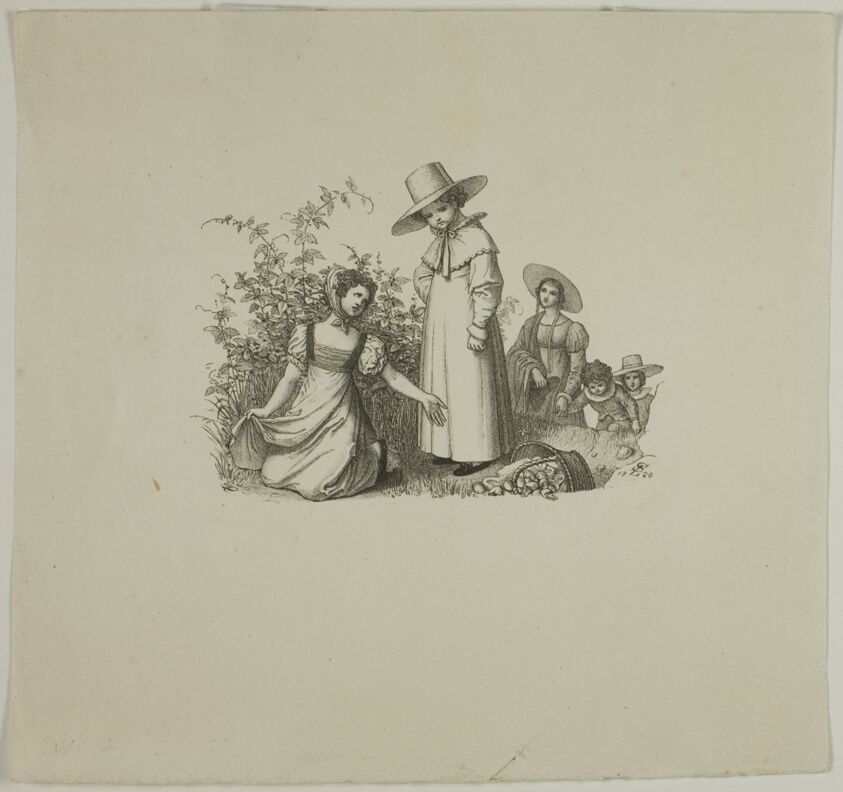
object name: Print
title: Family with Picnic Baskets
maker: Ludwig Ferdinand Schnorr von Carolsfeld (German, 1788-1853)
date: 1820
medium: Lithograph on cream wove paper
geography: Germany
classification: lithograph; print; prints and drawing